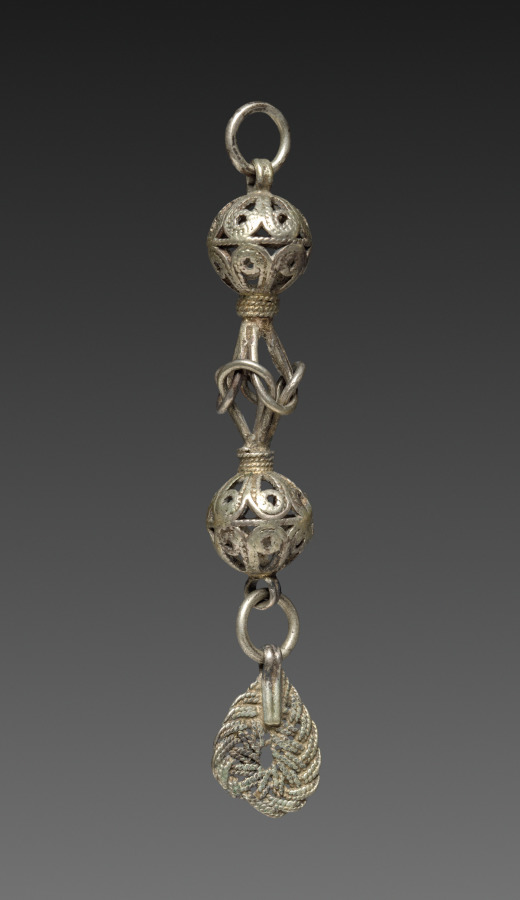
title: Button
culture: Balkans(?), 19th century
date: 1800s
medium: silver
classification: Jewelry